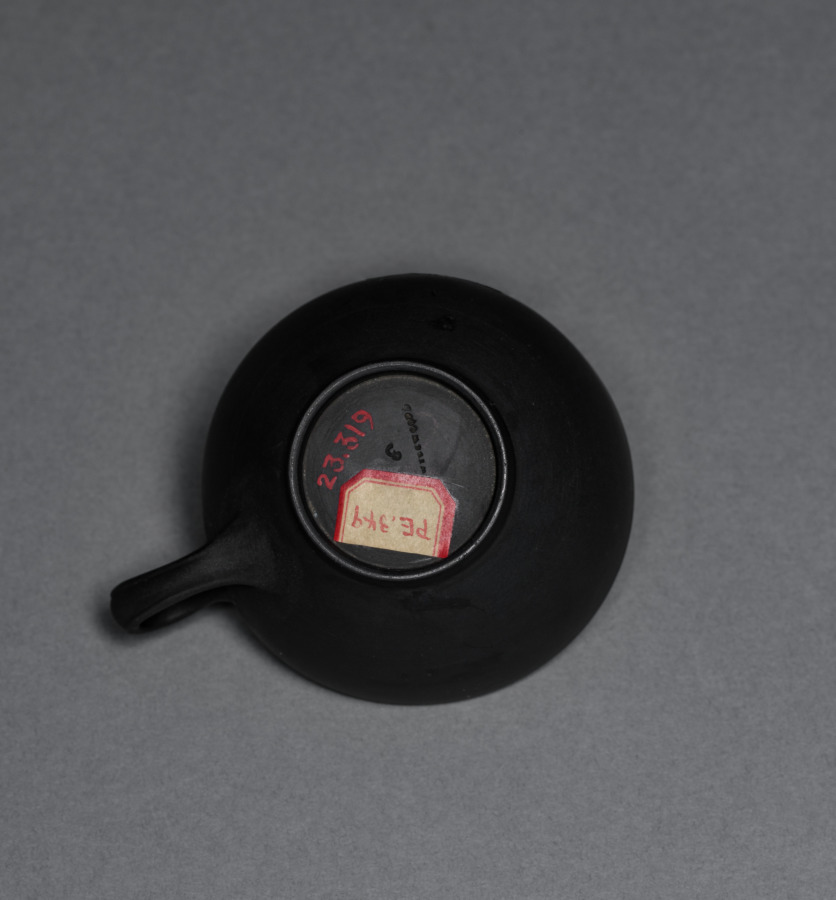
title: Cup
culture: England, Staffordshire, late 18th century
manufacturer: Wedgwood Factory (British)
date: late 1700s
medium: pottery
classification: Ceramic